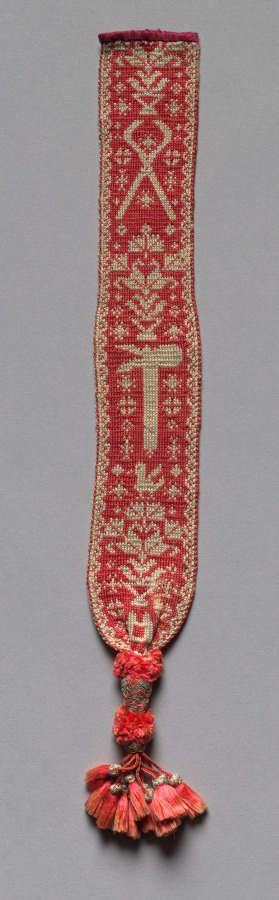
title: Bible Mark (Four of Four)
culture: Spain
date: 1700s–1800s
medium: knitted silk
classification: Knitting